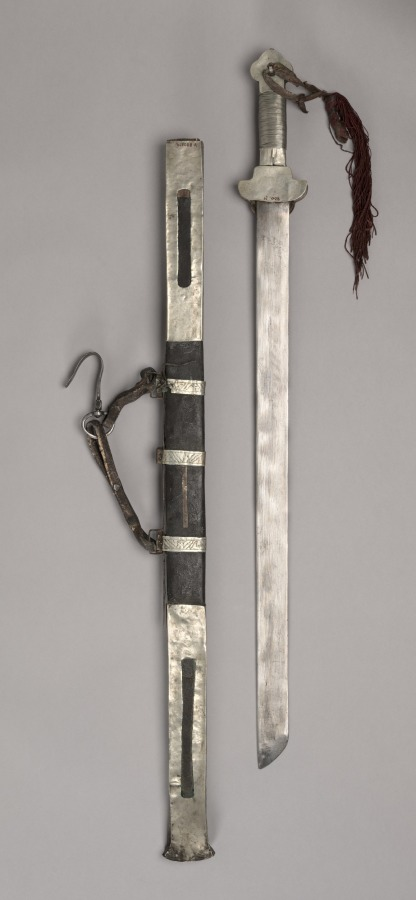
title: Sword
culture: Eastern Tibet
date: 1800s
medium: iron and silver with bone, turquoise, leather and brass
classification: Arms and Armor